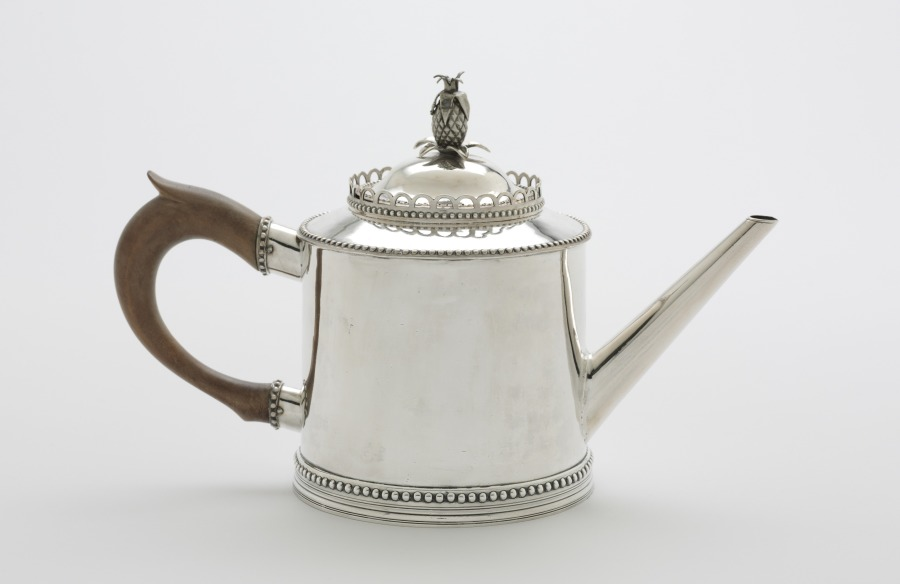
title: Teapot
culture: America, Pennsylvania, Philadelphia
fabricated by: John David (American, 1736–1793)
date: c. 1790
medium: silver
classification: Silver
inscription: engraved: "EFE" in script .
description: This teapot may have belonged to Dr. Enoch F. Edwards, George Washington’s personal physician.